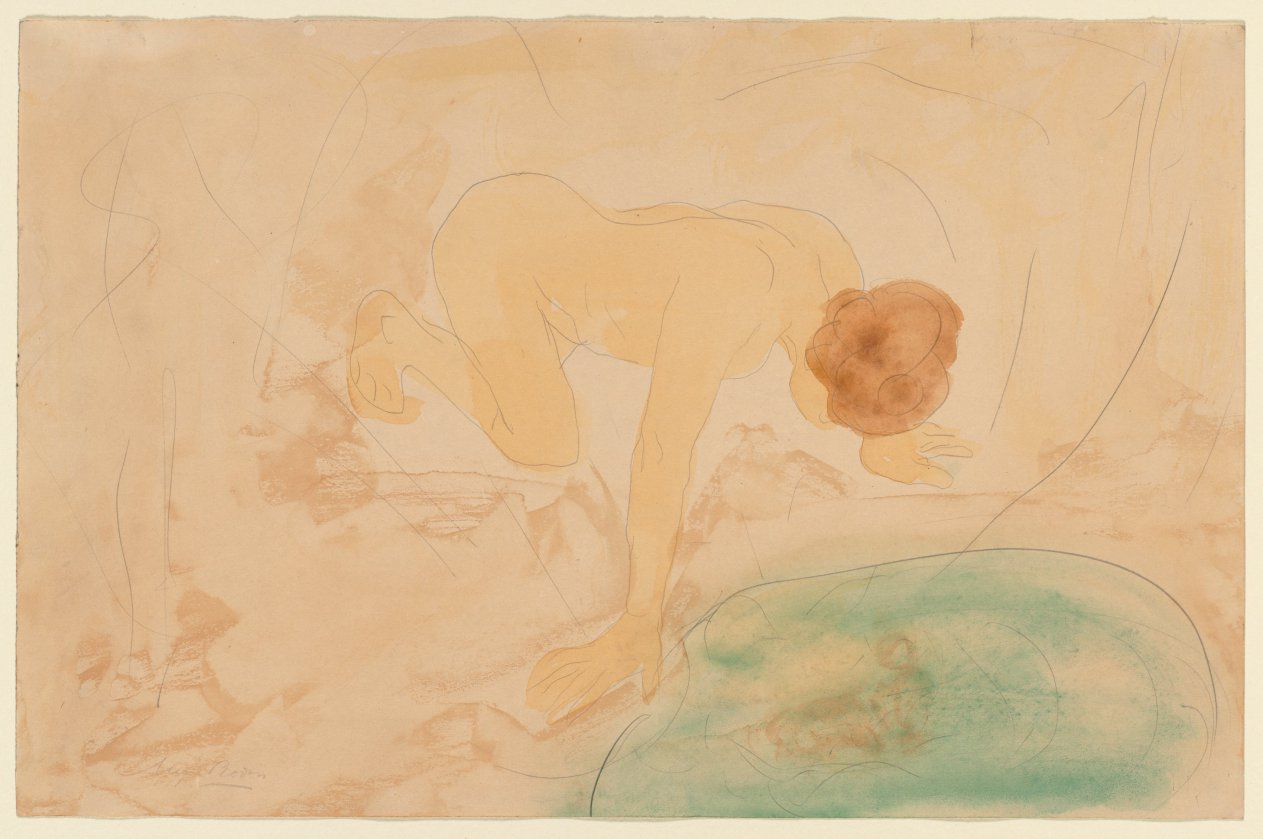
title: The Reflection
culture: France, late 19th Century-early 20th Century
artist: Hand B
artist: style of Auguste Rodin (French, 1840–1917)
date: c. 1900–10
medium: graphite and watercolor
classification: Drawing